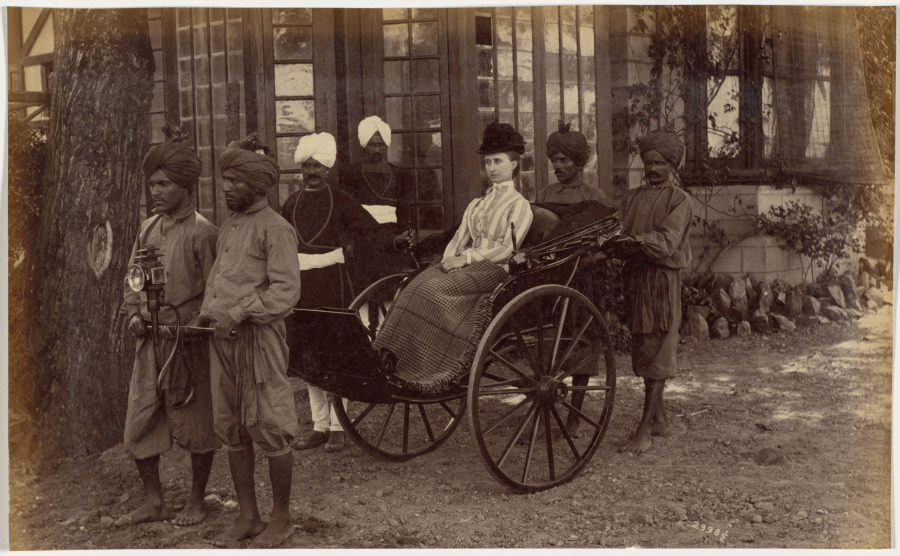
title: Miss Lyall, Shimla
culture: India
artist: Raja Deen Dayal (Indian, 1844–1905)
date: 1887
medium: albumen print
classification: Photograph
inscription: Stamped in black ink on verso: “28.7.F” Written in pencil on verso: “Miss Lyall Simla”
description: A number of Deen Dayal’s Simla portraits include rickshaws, which were items of great novelty, being found in India only in Simla at the time. The two-wheeled, human-powered passenger cart first appeared in Japan around 1870 and was introduced to Simla around 1880 by a Scottish missionary. The town’s steep hills required four drivers, two to pull and two to push. Horse-drawn buggies were another common means of transport.